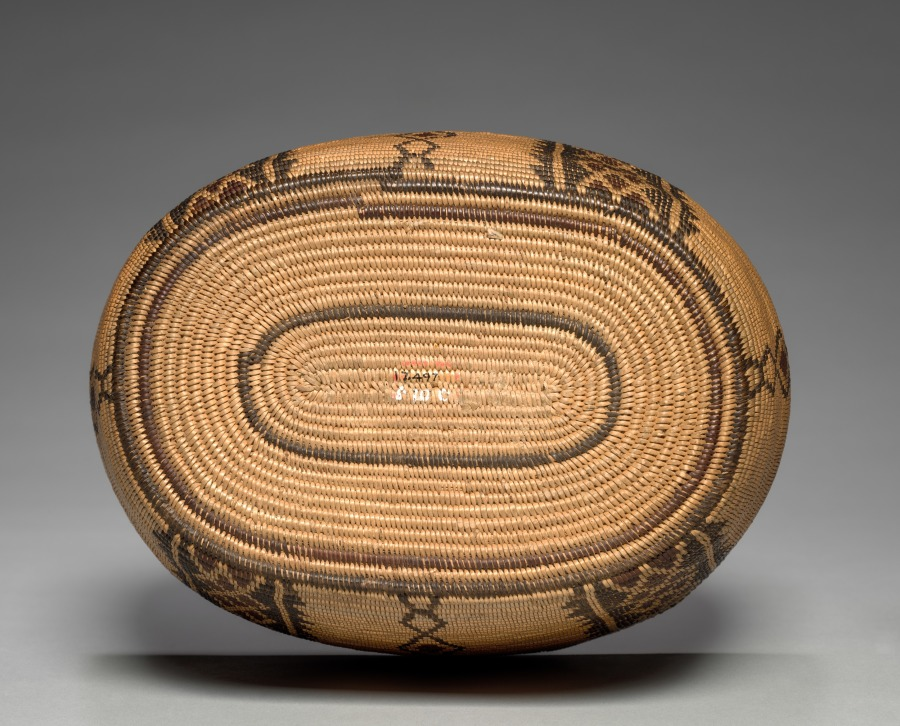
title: Bowl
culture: Great Basin, Timbisha Shoshone (Panamint)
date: c 1900–1910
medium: willow, devil's claw, yucca root; coiled (3 rods)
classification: Basketry